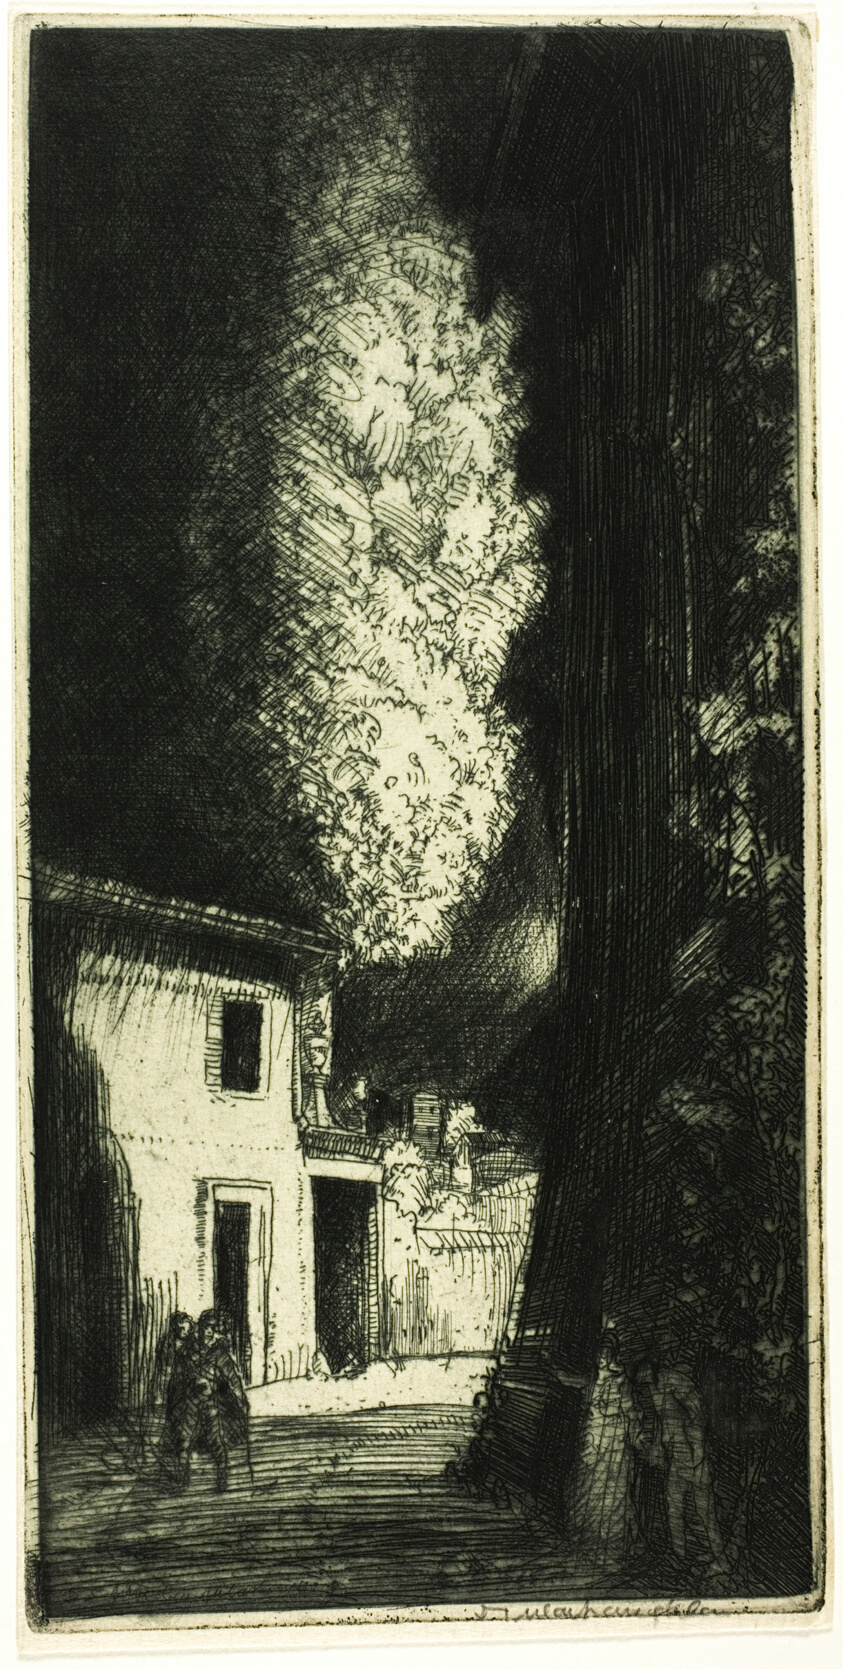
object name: Print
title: The Haunted House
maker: Donald Shaw MacLaughlan (American, born Canada, 1876-1938)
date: 1909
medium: Etching in black on cream wove paper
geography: United States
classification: etching; print; prints and drawing